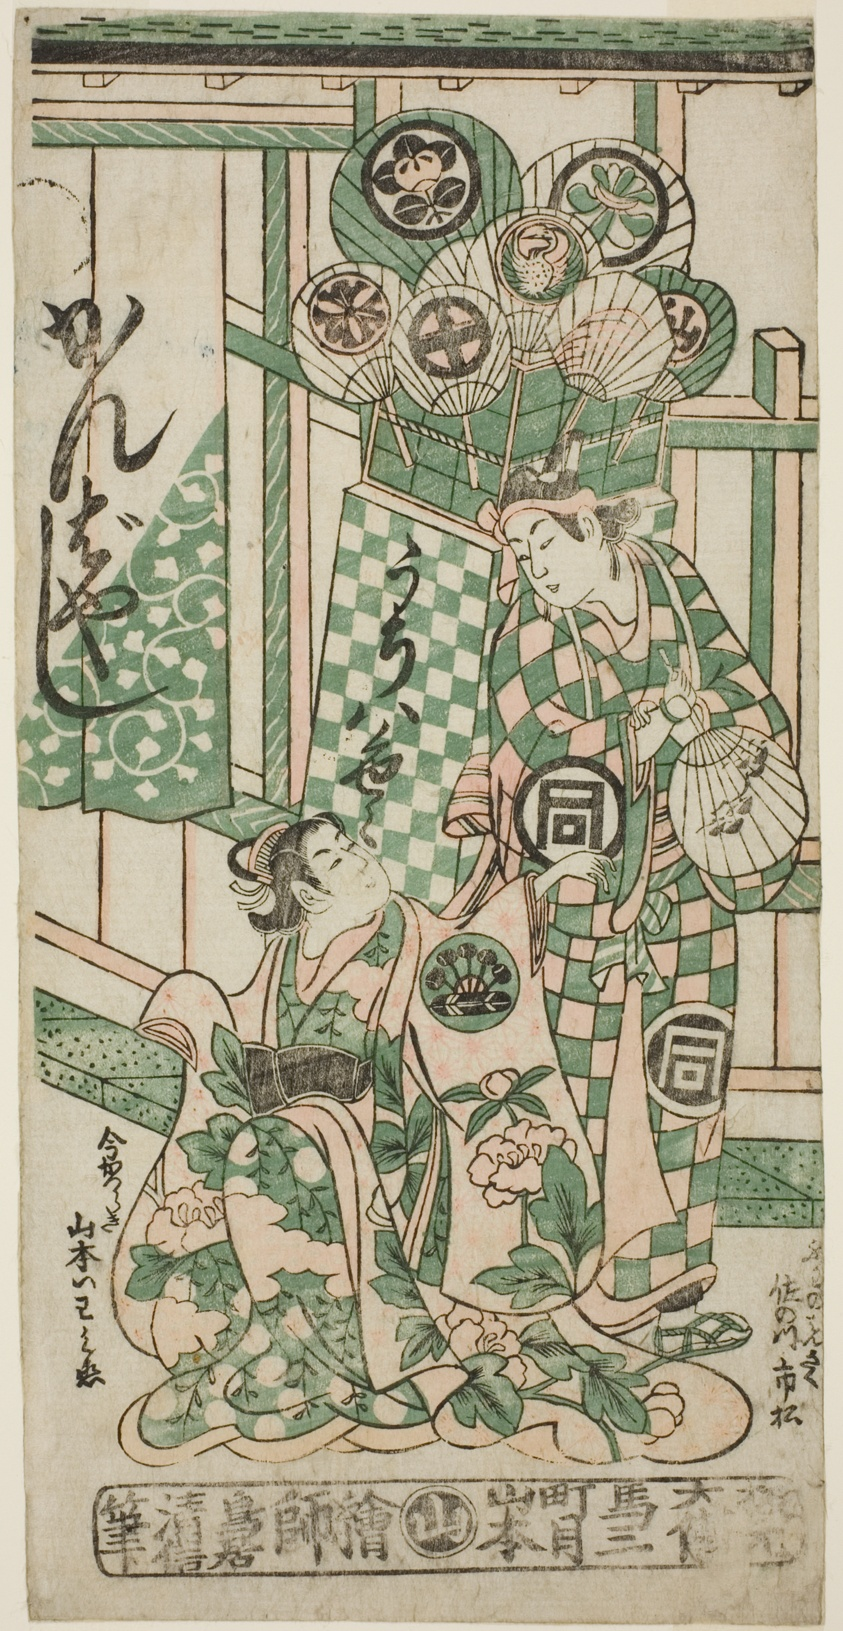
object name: Print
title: The Actors Yamamoto Iwanojo as the courtesan Katsuragi and Sanogawa Ichimatsu I as Fuwa Bansaku in the play "Monzukushi Nagoya Soga," performed at the Ichimura Theater in the first month, 1748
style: Japanese (culture or style)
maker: Torii Kiyonobu II (Japanese, active c. 1725-61)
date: 1748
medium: Color woodblock print; hosoban, benizuri-e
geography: Japan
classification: woodblock print; print; asian art